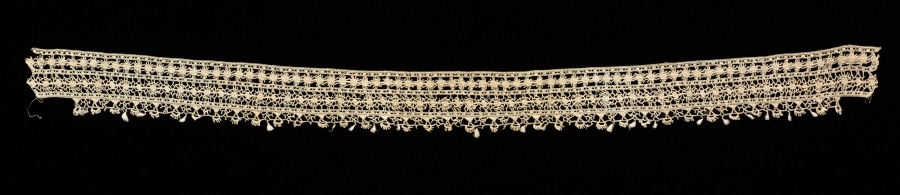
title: Lace Collar and Cuff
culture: Italy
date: 1600s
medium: Knotted lace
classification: Lace